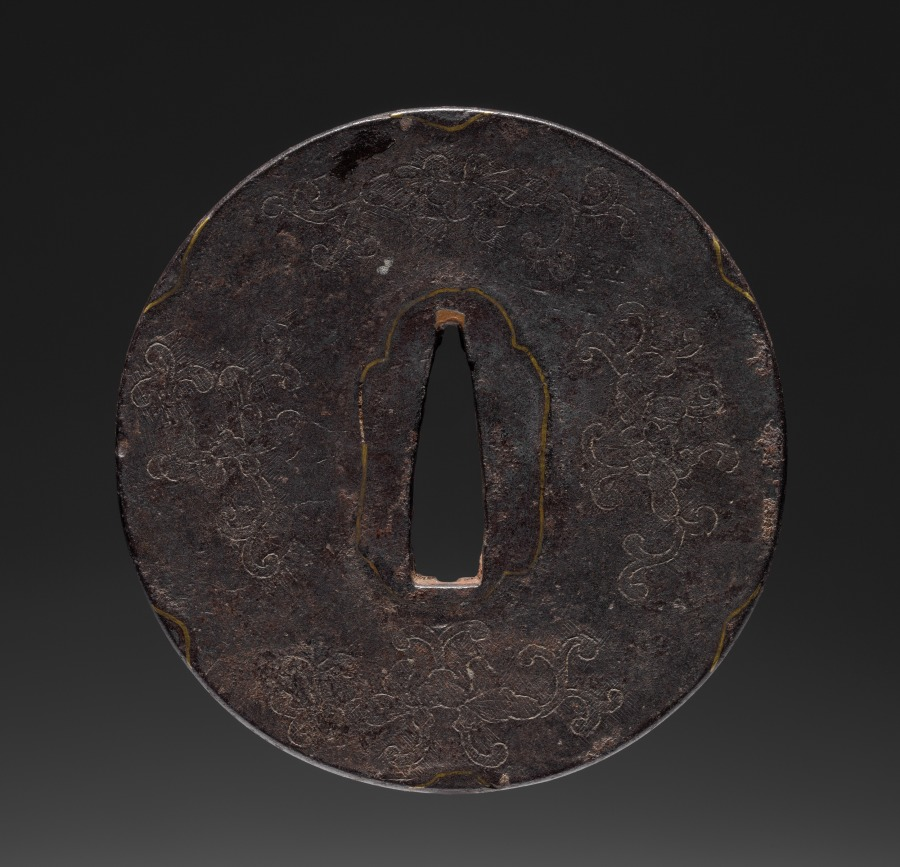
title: Sword Guard (Tsuba)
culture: Japan, possibly Edo period (1615-1868)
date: c. 1615–1868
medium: iron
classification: Arms and Armor